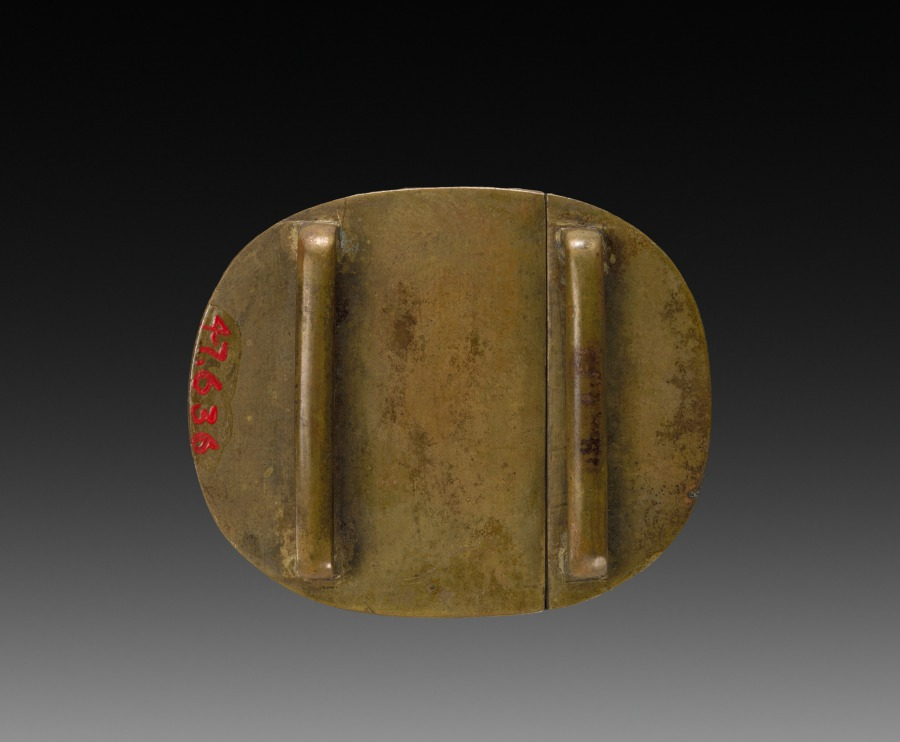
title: Buckle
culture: China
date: 1900s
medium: brass set with green jade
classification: Jewelry